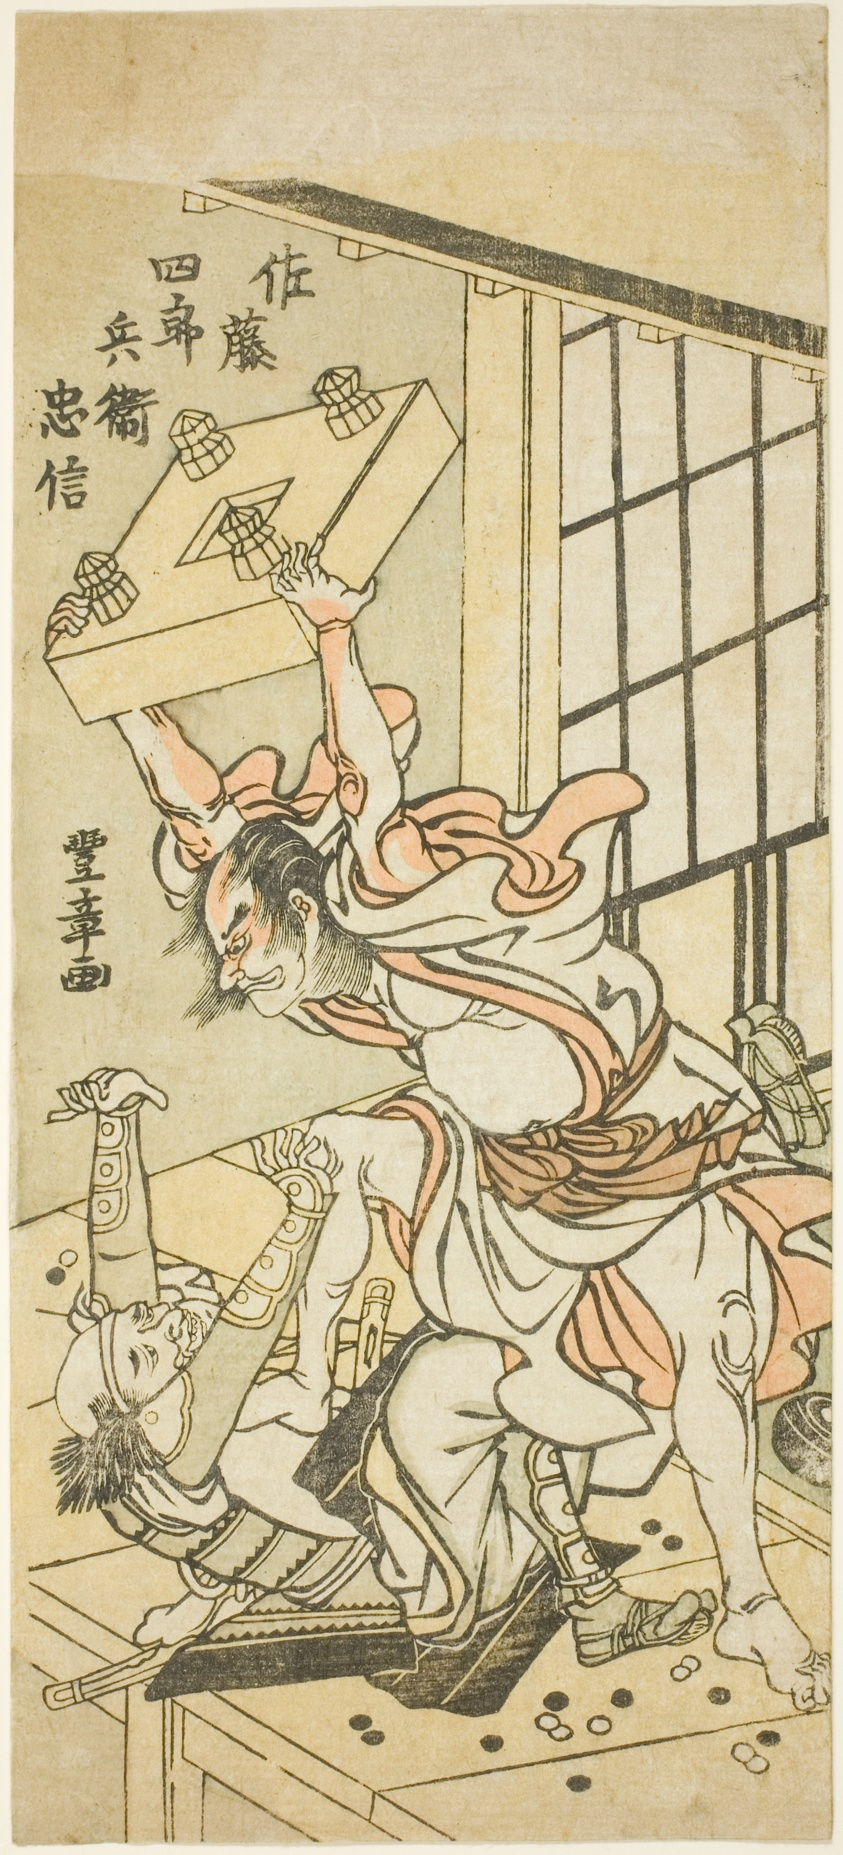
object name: Print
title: Sato Shirobei Tadanobu (Sato Shirobei Tadanobu)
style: Japanese (culture or style)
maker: Kitagawa Utamaro 喜多川 歌麿; Japanese, 1753 (?)-1806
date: c. 1776–80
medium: Color woodblock print; hosoban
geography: Japan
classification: woodblock print; print; asian art